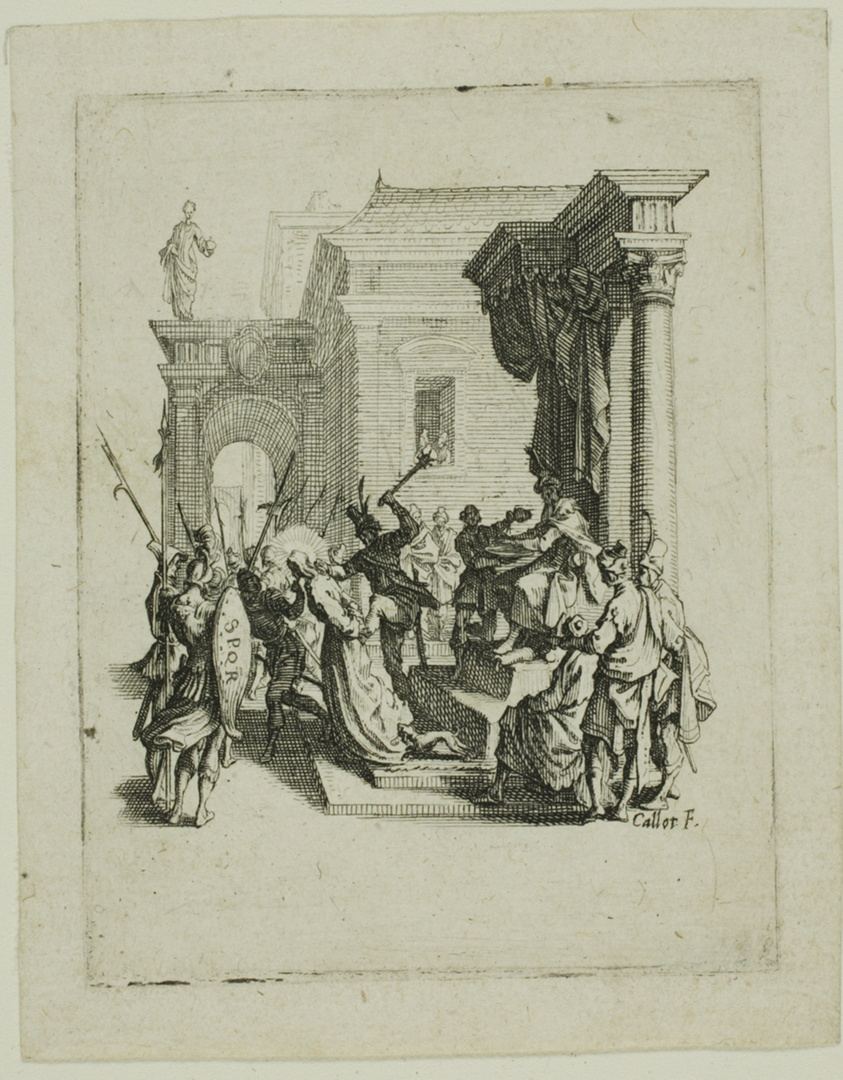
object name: Print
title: The Condemnation to Death, from The Small Passion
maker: Jacques Callot (French, 1592-1635)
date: 1624/31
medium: Etching on ivory laid paper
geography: France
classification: etching; print; prints and drawing